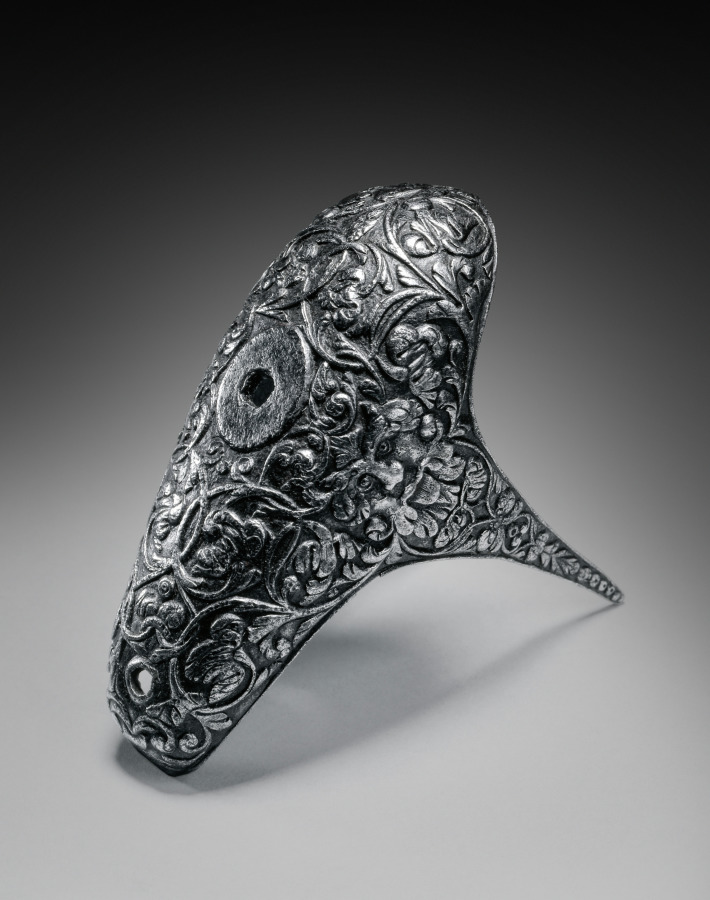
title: Butt-Cap from a Flintlock Pistol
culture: Italy, late 17th Century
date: c. 1690–1700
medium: steel, chiseled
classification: Arms and Armor